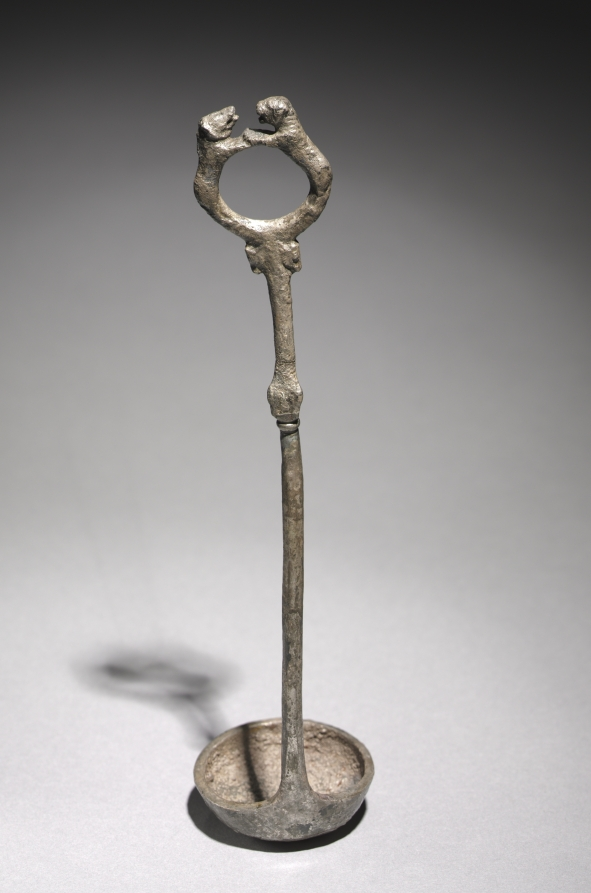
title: Ladle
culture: Syria(?), Achaemenid (550–330 BCE)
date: c. 525–450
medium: silver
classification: Metalwork